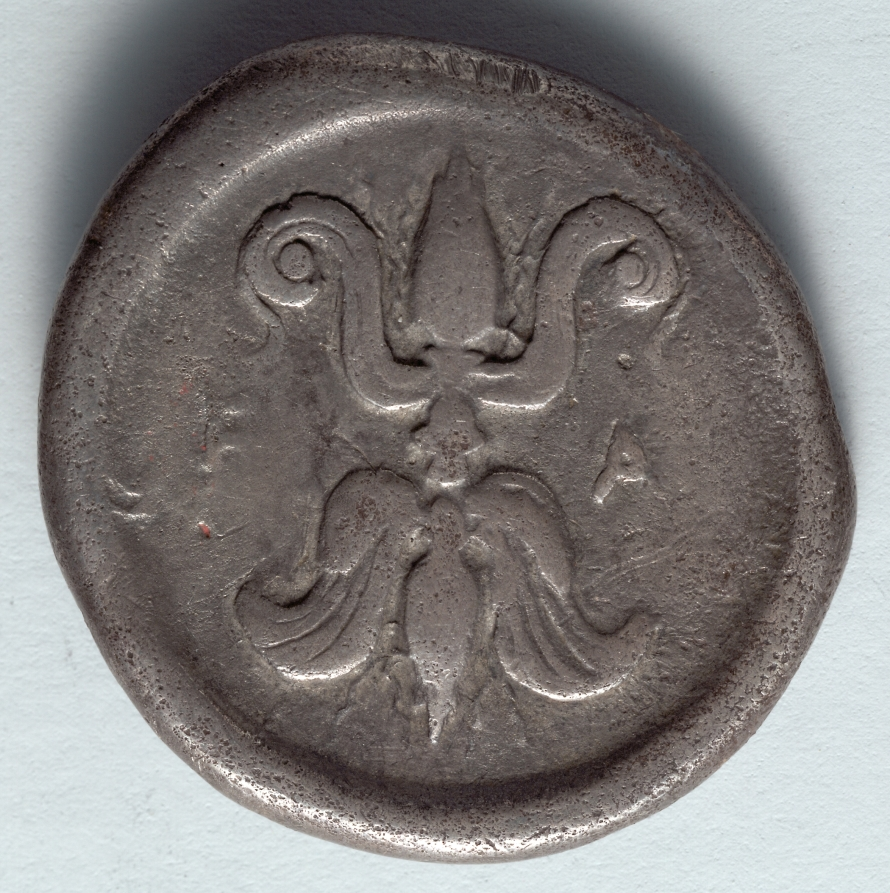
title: Stater: Thunderbolt (reverse)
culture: Greek, minted in Elis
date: c. 432–421 BCE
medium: silver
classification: Coins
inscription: Ϝ | Α